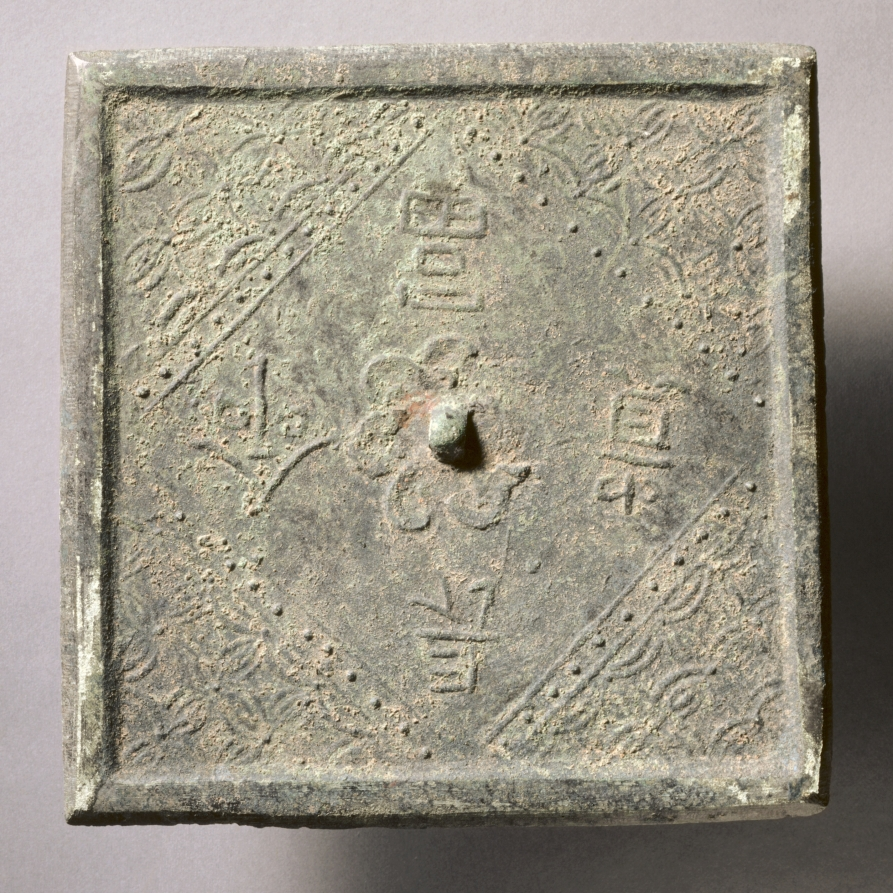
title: Square Mirror with Felicitous Message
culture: China, Song dynasty (960-1279)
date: early 900s–late 1200s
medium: bronze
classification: Metalwork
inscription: [May you enjoy] a long life, health, and fortune.